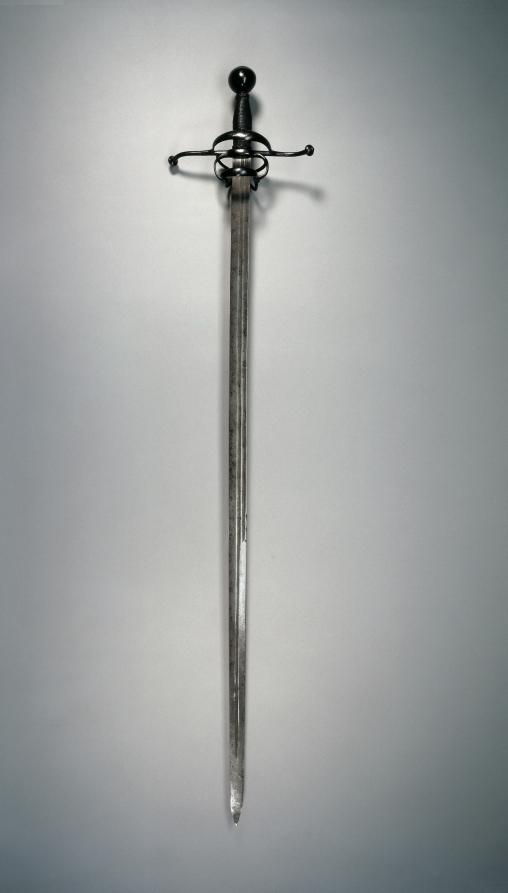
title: Rapier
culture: Germany, early 17th Century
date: c. 1610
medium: steel; hilt of deeply blued steel; wood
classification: Arms and Armor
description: The rapier was a sword worn with civilian dress and used in duels. The term rapier derives from the 16th-century French word rapière, which in turn was derived from the Spanish espada ropera, or “dress sword.” The rapier was a light weapon with a straight double-edged and pointed blade that, with the development of the art of fencing in the 1500s and 1600s, gradually became narrower and lighter, and thus suitable for thrusts only. With the new technique of swordplay emphasizing the point of the blade, sword guards became more complex to protect the duelist’s unarmored hand. These elaborate guards were frequently decorated by various techniques—chiseling, bluing, russeting, and damascening.